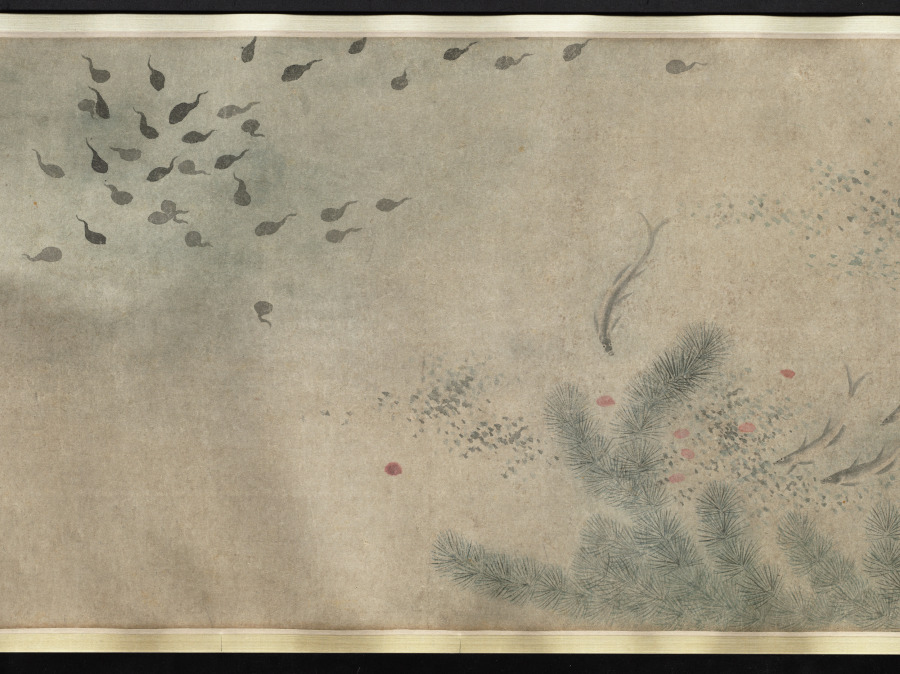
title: Insects and Flowers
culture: China, Qing dynasty (1644-1911) or Republican period (1912-49)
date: c. 1900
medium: Handscroll, ink and color on paper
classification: Painting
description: More than 26 feet long, this scroll presents insects, reptiles, and plants in delicate brushwork and pale colors, referring in style to earlier Southern Song dynasty (1127–1279) bird-and-flower paintings. Upon closer inspection, ants dismember a butterfly and reptiles wait to ambush their prey. An inscription at the end of the painting gives us an idea of its meaning: Attributed to the Qing dynasty scholar Zhang Xigeng (張錫庚, 1801–1861), the inscriber relates the work to an earlier painting by Qian Xuan (錢選, c. 1235–before 1307) and further suggests that the painting may allude to the relentlessness of natural selection. By drawing a parallel to tumultuous episodes in Chinese history, the writer might even hint at the domestic rebellions and the aggression of Western powers against China in his lifetime, particularly the Opium Wars (1839–60).